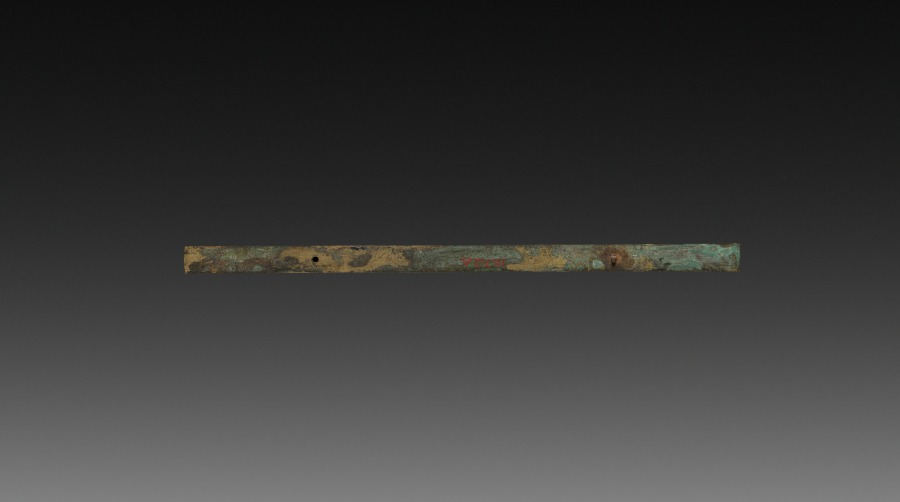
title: Ornamental Detail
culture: France, late 18th century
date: late 1700s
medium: gilt bronze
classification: Metalwork